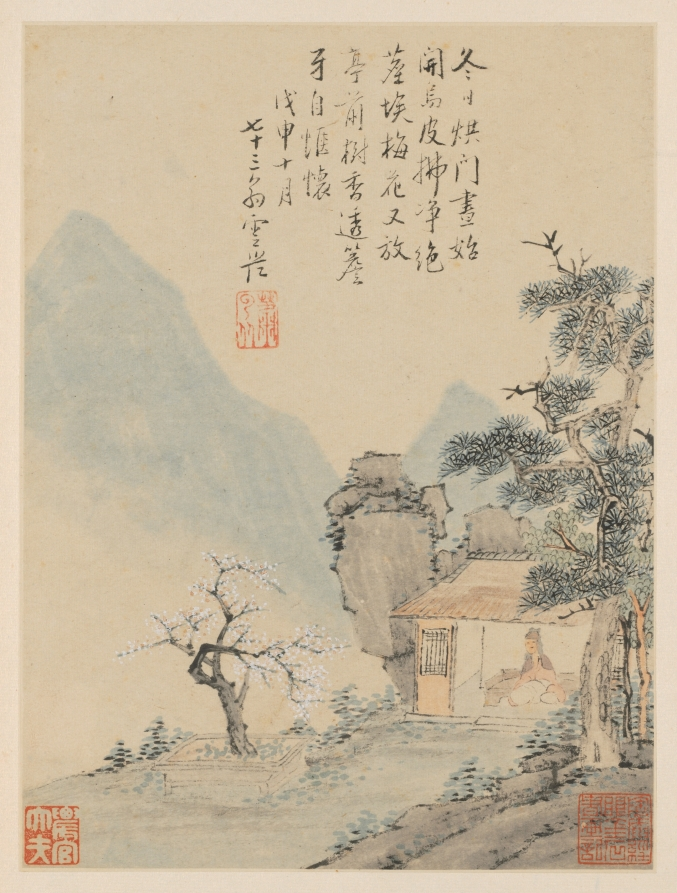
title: Album of Seasonal Landscapes, Leaf H (previous leaf 8)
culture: China, Qing dynasty (1644-1911)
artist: Xiao Yuncong (Chinese, 1596–1673)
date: 1668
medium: album leaf; ink and light color on paper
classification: Painting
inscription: Artist's inscription, signature, and 8 seals: Leaf H. When the winter sun warms up the door, the day begins;/ I clean up my black leather shoes to break off from the dusty world./ Prunus blossoms again bloom on the tree in front of the pavilion;/ Their fragrance penetrates the eaves and satisfies my innermost self. In the wushen year [1668], tenth month, the old man of seventy-three, Yuncong. [seal] Xiao Yuncong.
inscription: 9 additional seals: 2 of Chen Yixi 陳奕禧 (1646-1709); 4 of Li Yufen 李玉棻 [Li Yunhu 李韵湖] (active mid-1800s); 3 unidentified.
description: Throughout his lifetime, Xiao Yuncong visited Nanjing and Yangzhou, cities embedded in the fertile and water-rich Jiangnan region, as reflected in his paintings. Xiao painted from nature, and his landscapes are informed by the seasons and his travels, as well as by his experience as a print designer. Xiao’s fresh, light colors continue to appear in later Shanghai school paintings. This album was formerly in the collection of Li Yufen in Yangzhou and then owned by Wu Hufan in Shanghai. While the artist impressed his seal consistently below his poetic inscriptions in the upper parts of the composition, the red seals on the margins and in the lower corners of the paintings are impressions by the album’s previous owners.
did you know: The hardy white prunus blossoms in the poetic inscription and the painting itself identify this as a late winter scene.